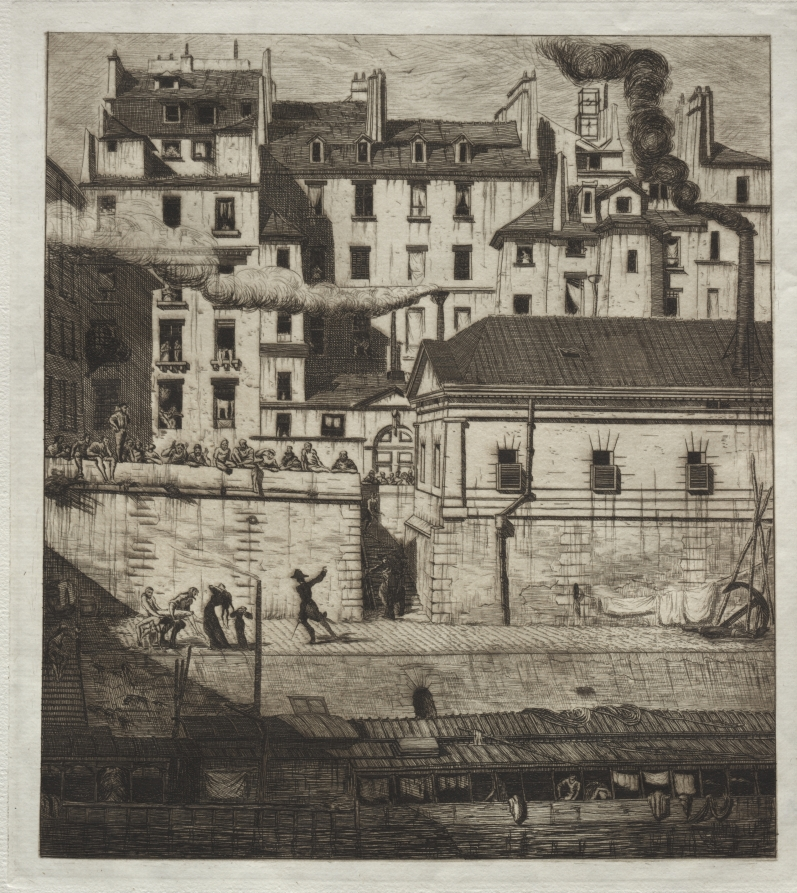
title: La Morgue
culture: France, 19th century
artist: Edmond Gosselin (French)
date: c. 1881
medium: etching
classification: Print